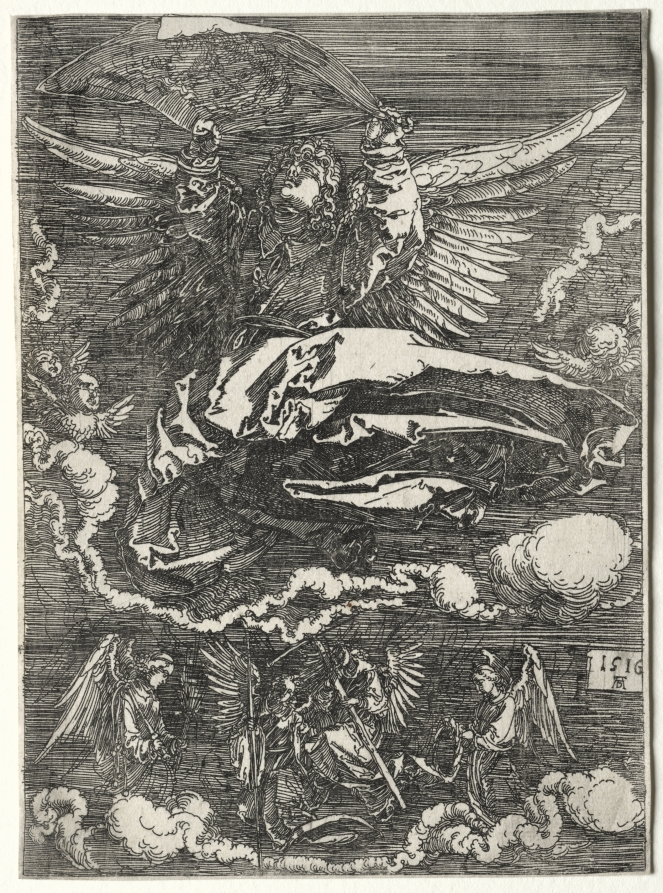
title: The Angel with the Sudarium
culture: Germany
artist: Albrecht Dürer (German, 1471–1528)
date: 1516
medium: etching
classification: Print